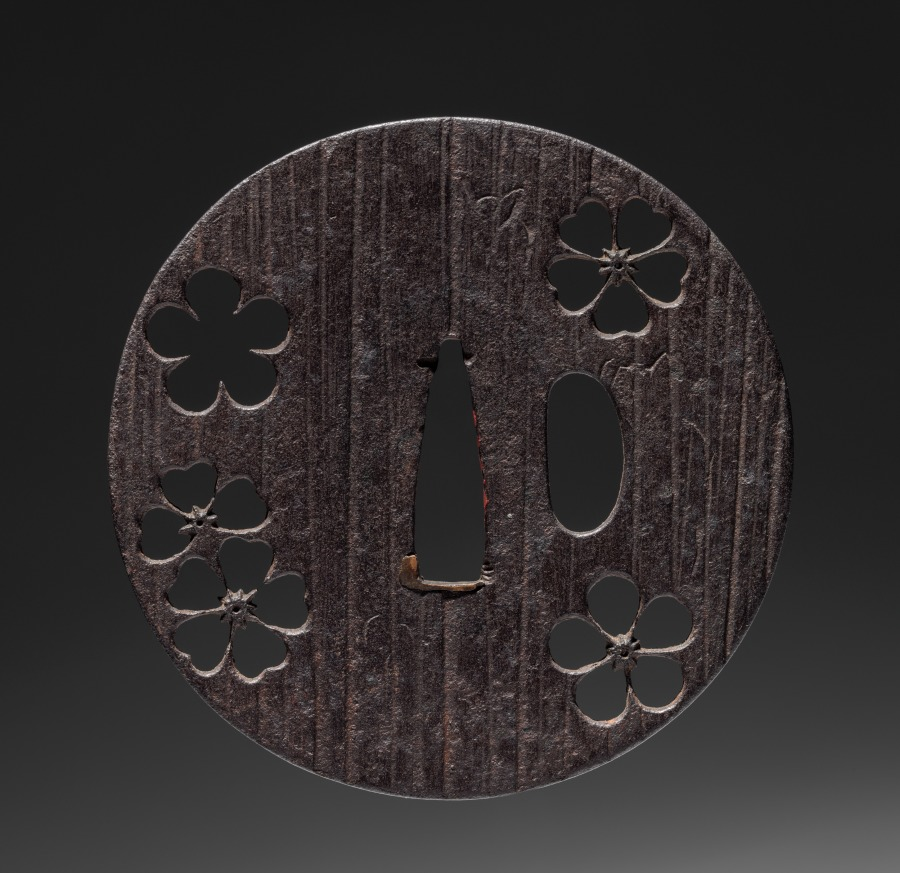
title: Sword Guard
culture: Japan, Edo period (1615–1868)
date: 1615–1868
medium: iron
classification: Arms and Armor